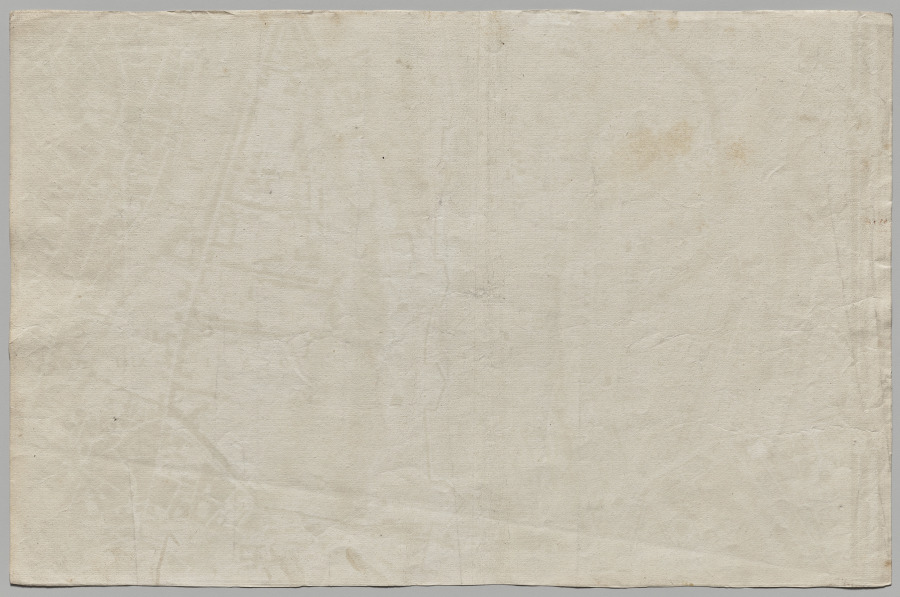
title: Nuova pianta di Roma data in luce da Giambattista Nolli l’anno MDCCXLVII, known as La Pianta Grande di Roma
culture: Italy, 18th century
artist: Giovanni Battista Nolli (Italian, 1701–1756)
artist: Carlo Nolli (Italian, 1690–1790)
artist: Rocco Pozzi (Italian, 1701–1774)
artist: Pietro Campana de Soriano (Italian, 1725–c. 1779)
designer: Stefano Pozzi (Italian, 1699–1768)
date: 1748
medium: etching and engraving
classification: Print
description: The monumental Pianta Grande di Roma, or Large Plan of Rome, which measures about 5 x 7 feet when its twelve plates are assembled, is a landmark in both cartography and printmaking. The map is considered the first scientific rendering of Rome, establishing new standards of accuracy and thoroughness when it was published in 1748. Devised by the Lombard architect and surveyor Giovanni Battista Nolli (Italian, 1701-56), the creation of the map required over ten years of surveying the city carried out by Nolli and a team of assistants with the help of new measuring devices. In Nolli’s “ichnographic” (also called “ground”) plan, architectural features and the urban infrastructure are reduced to a single horizontal slice, a minutely detailed footprint that conveys dimensions, proportions, and orientations to scale with the utmost clarity.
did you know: To make this map, Pope Clement XII granted the mapmaker permission to measure courtyards and other interior, inaccessible spaces in monastic communities, even those in nuns’ convents, which was controversial at the time.